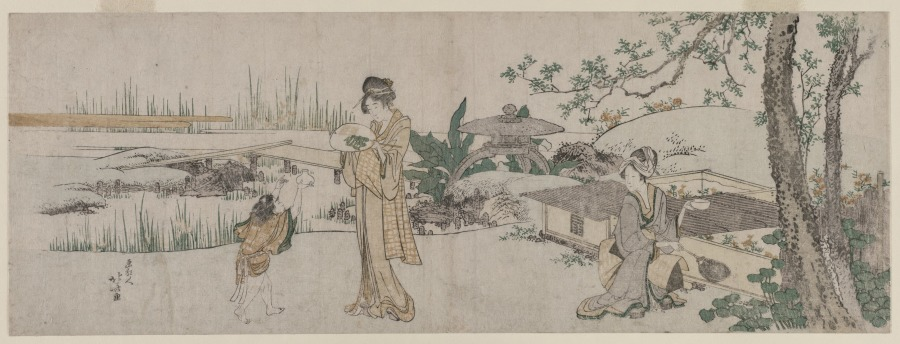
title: Two Women and a Child Beside a Goldfish Tank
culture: Japan, Edo period (1615–1868)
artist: Katsushika Hokusai (Japanese, 1760–1849)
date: c. 1800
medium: color woodblock print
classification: Print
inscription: Signature: Gakyojin Hokusai ga